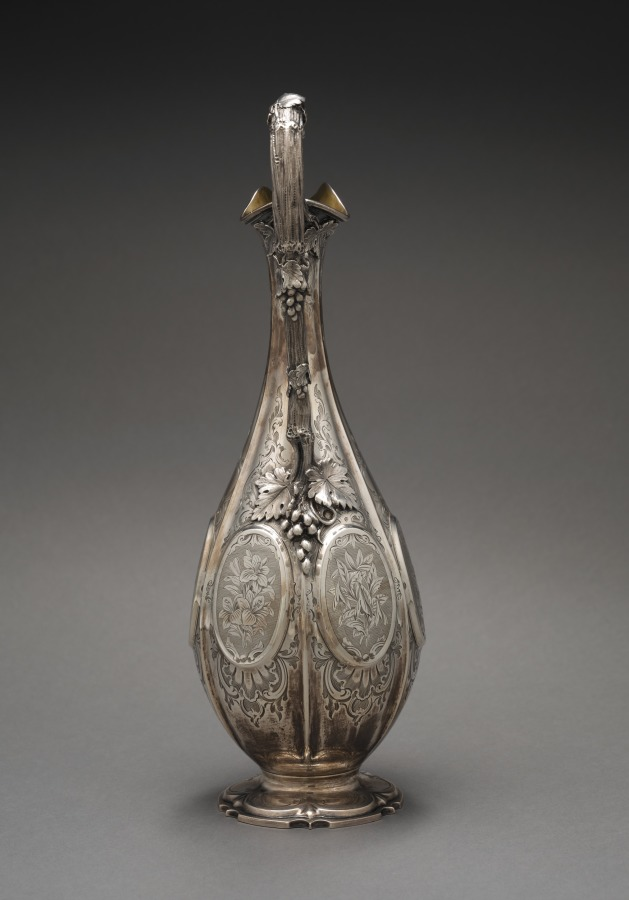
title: Pitcher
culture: England, 19th century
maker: Edward Barnard & Sons (British, c. 1680–2003)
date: c. 1870–80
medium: silver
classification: Silver